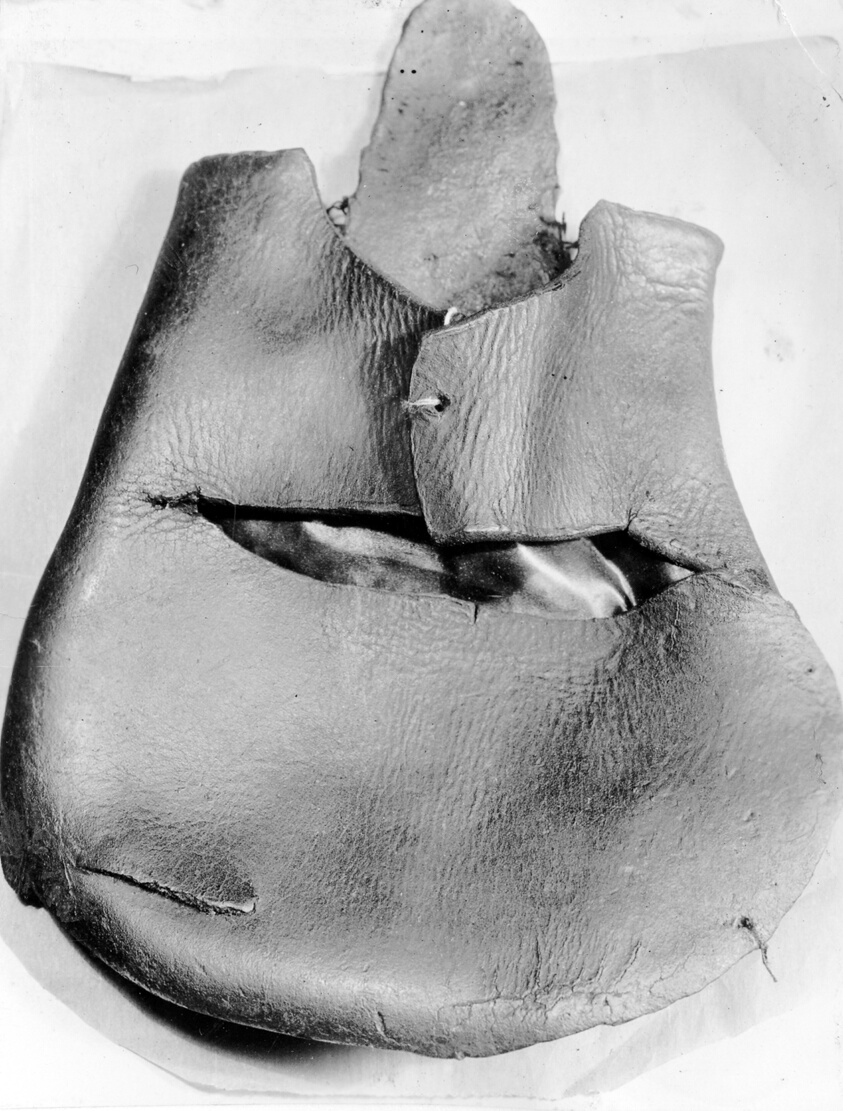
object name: Textile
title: Shoe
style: tudor, european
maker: England; Found in Hill Street, Finsbury Park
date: 1553/58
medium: Leather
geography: England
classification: textile; shoes - misc; costume accessory - shoe; costume; dress (garment); clothing